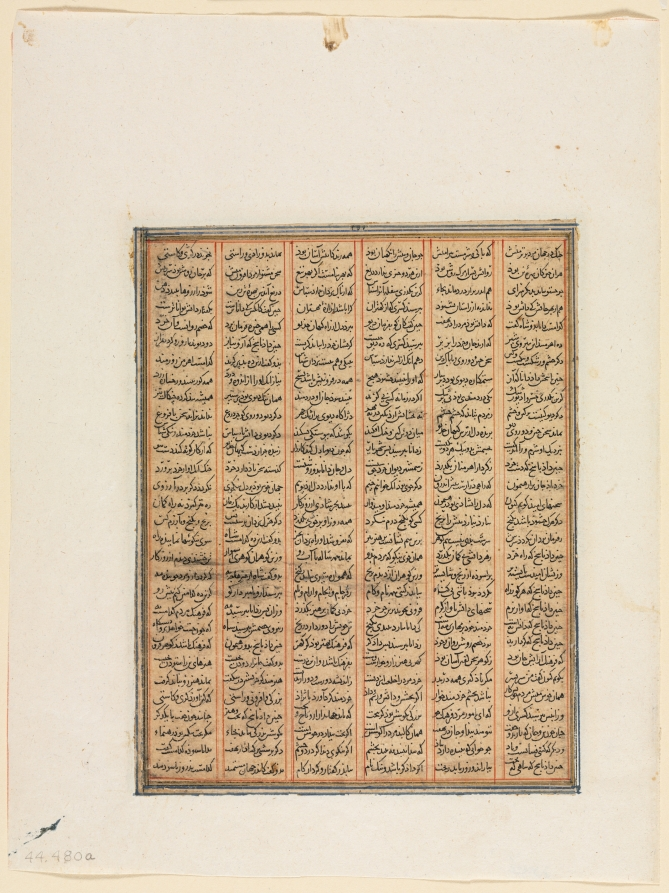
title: The Reign of Nushirwan, The Combat between the Khan of Chin and the Haitalians (recto) from a Shahnama (Book of Kings) of Firdausi (940–1019 or 1025)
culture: Iraq, Baghdad, Ilkhanid period (1256-1353)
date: c.1299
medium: ink and opaque watercolor on paper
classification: Manuscript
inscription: script: Naskh